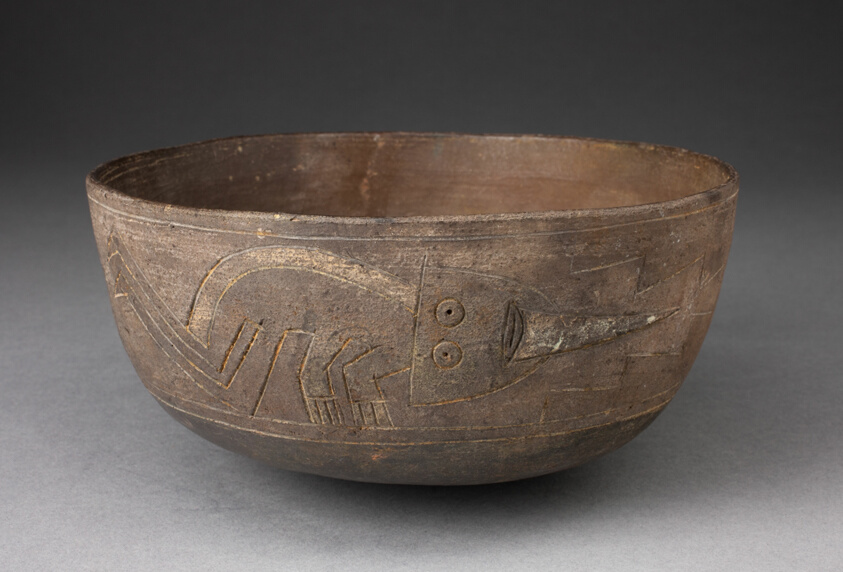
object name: Vessel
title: Bowl Depicting Incised and Painted Abstract Crouching Figure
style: paracas, andean, Arts of the Americas, andes, south american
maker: Paracas (Ica Valley, south coast, Peru)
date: 650–150 BCE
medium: Ceramic and pigment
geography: Peru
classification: bowl; earthenware; art of the americas; ceramics; vessel